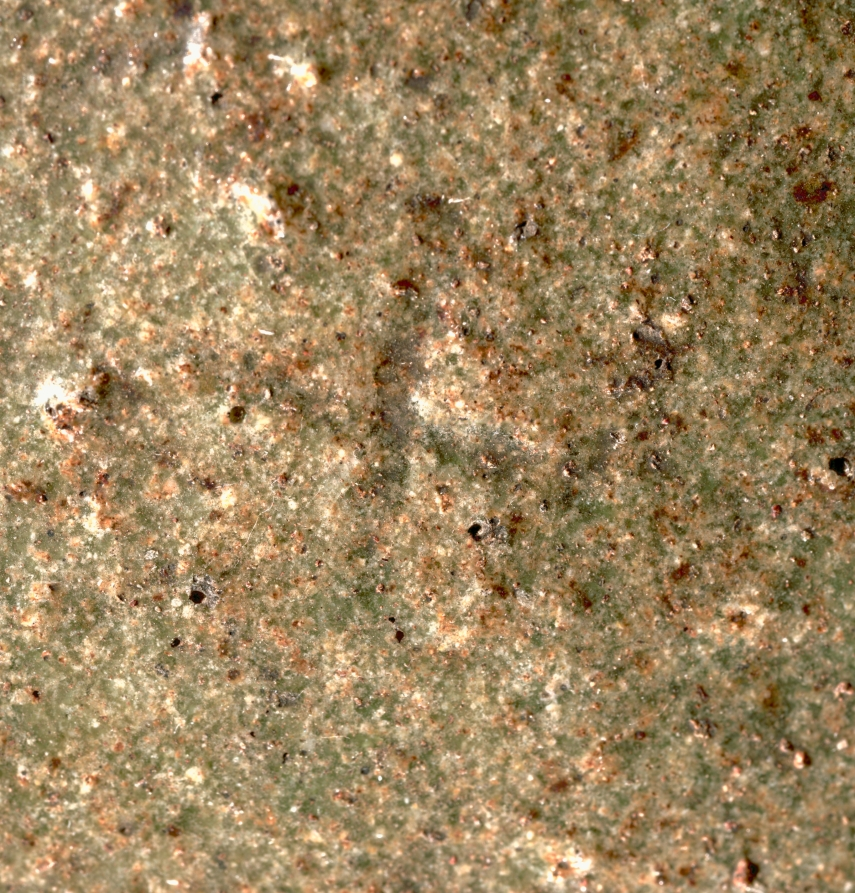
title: Storage Jar: Tamba Ware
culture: Japan, Muromachi period (1392–1573)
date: 1400s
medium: stoneware with natural ash glaze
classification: Ceramic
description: This vessel served as a storage container for rice or other grains in medieval farming communities. The piece was made by potters in Tamba, a fertile region west of Kyoto which used such vessels to send its agricultural products to towns throughout western Japan. Tamba ware is recognized by its warm green glaze, created as accumulations of natural wood ash settle on the clay body and liquefy when the kiln temperature is sufficiently high. The jar's contours reveal that it was built in four stages from many clay coils pressed together by hand. The smooth neck and mouth were wheel-turned. The vertical, incised lines visible on the reddish-brown body indicate where a comb-like tool scraped excess clay from the body wall; this technique helped conserve clay material and wood used in the firing. The scraping also exposes the grittiness of local Tamba clay, which in the 15th century did not undergo an extensive refining process.